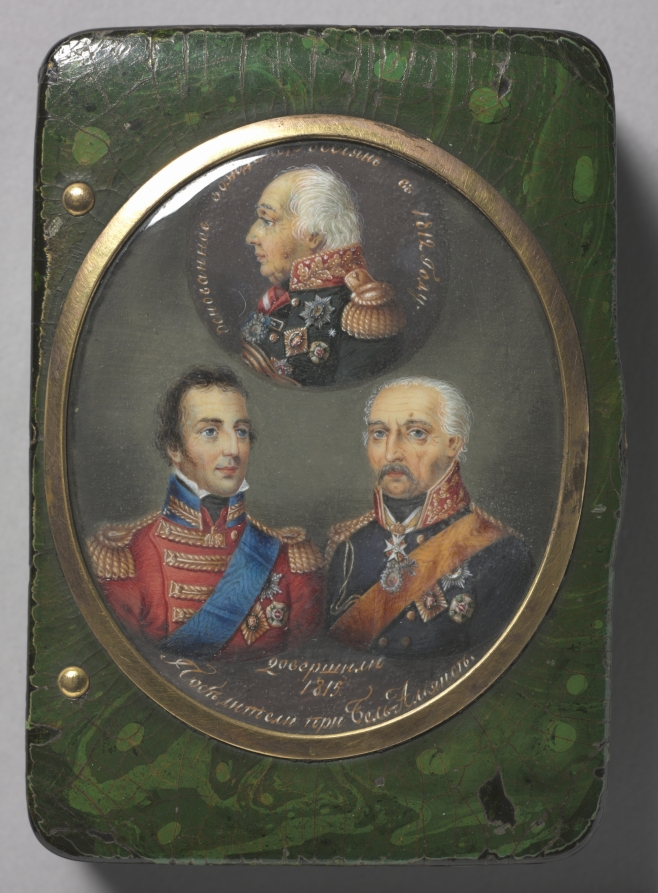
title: Box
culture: Russia, possibly Korobov Factory, early 19th century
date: c. 1815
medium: lacquered wood with painted miniature under glass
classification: Miscellaneous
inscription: Cyrillic inscriptions around miniature portraits, included in the inscriptions are the dates "1812" and "1815."